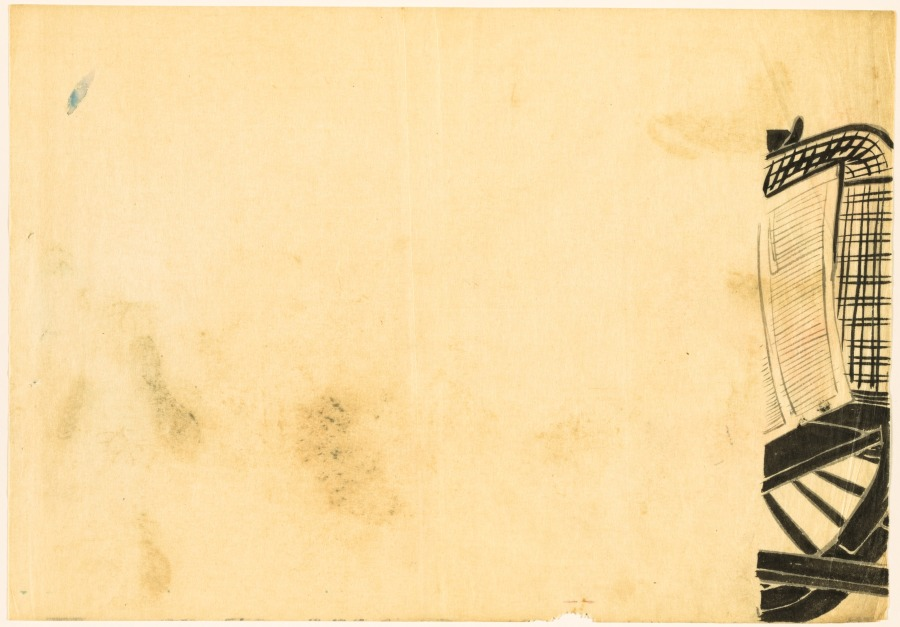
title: Flowers of a Hundred Worlds (Momoyogusa): Section of Flower-draped Carts (Hanasashiguruma)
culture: Japan, Meiji period (1868–1912)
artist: Kamisaka Sekka (Japanese, 1866–1942)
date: 1909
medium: ink and color on paper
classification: Drawing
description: Kamisaka Sekka made preparatory drawings for his Flowers of a Hundred Worlds series on tracing paper with ink and color. The freehand sketches are much looser than the finished, printed compositions.